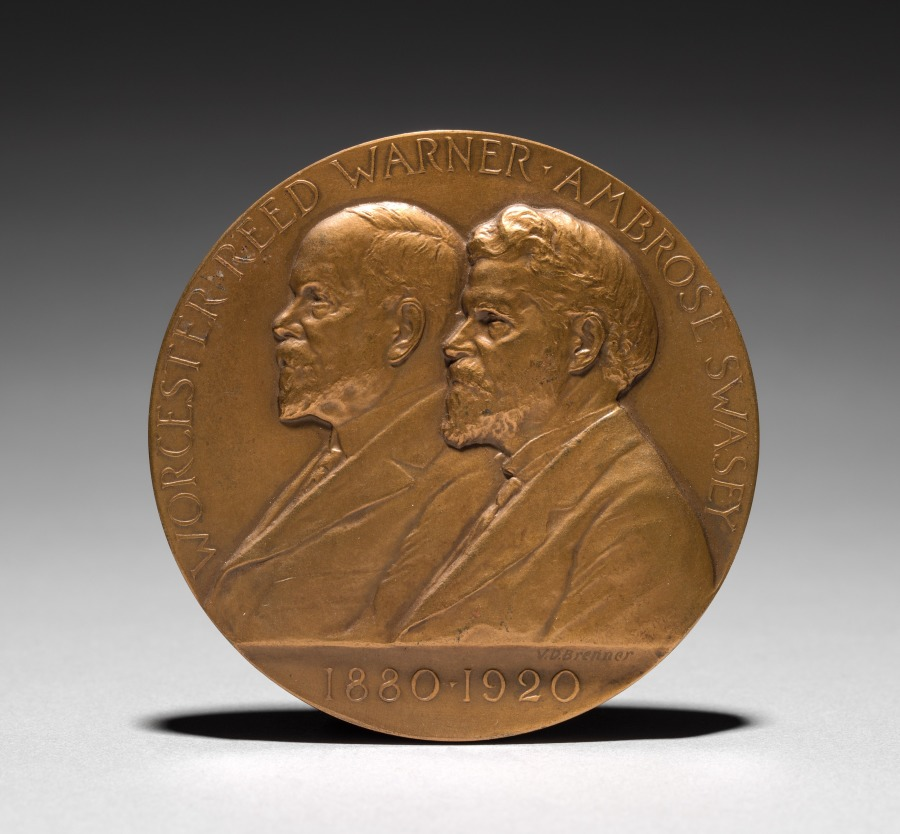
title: Medal Commemorating the 40th Anniversary of the Warner and Swasey Company (obverse)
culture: America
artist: Victor D. Brenner (American, 1871–1924)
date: 1920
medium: bronze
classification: Metalwork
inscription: "Worcester Reed Warner. Ambrose Swasey, 1880-1920."